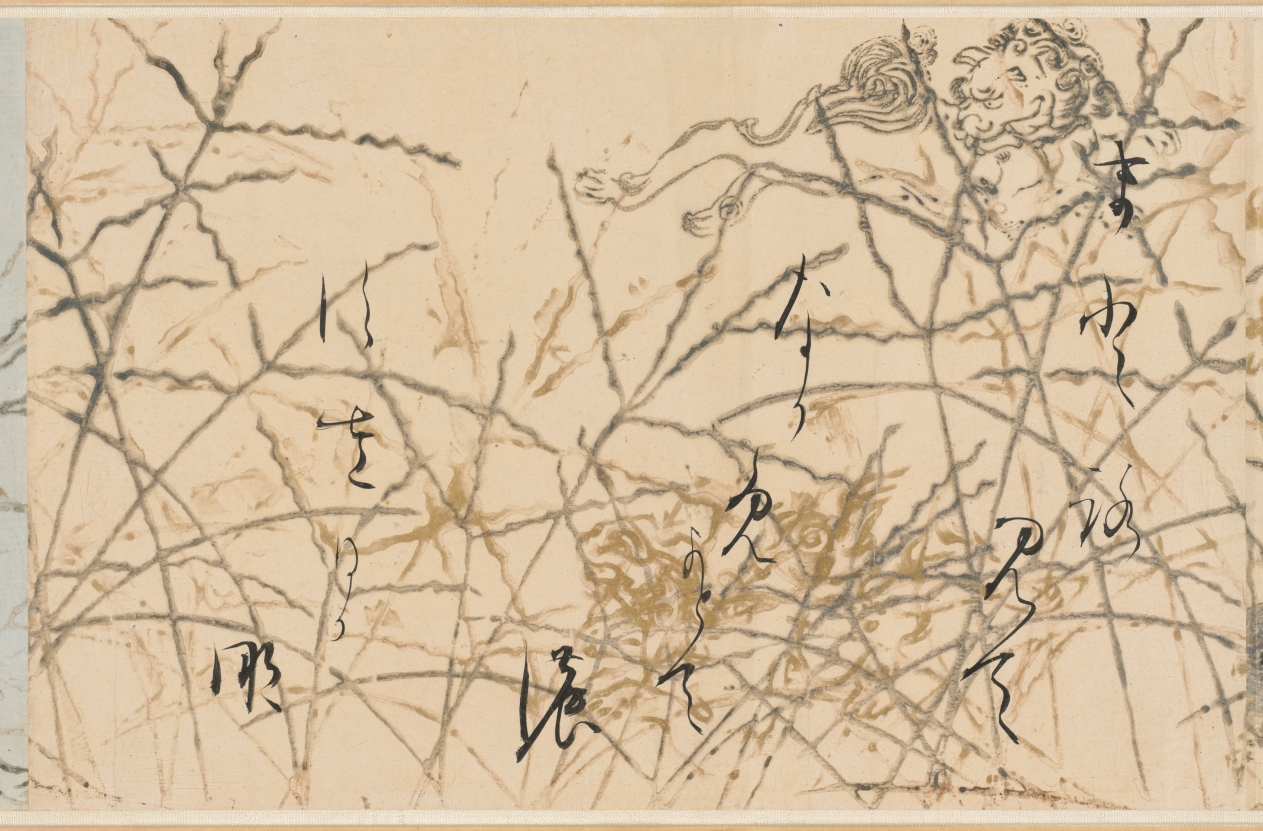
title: Selections from the New Collection of Japanese Poems from Ancient and Modern Times (Shinkokin wakashū) with Printed Designs of Chinese Lions and Crab Finger Grass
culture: Japan, Edo period (1615–1868)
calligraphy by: Hon'ami Kōetsu (Japanese, 1558–1637)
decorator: Tawaraya Sōtatsu (Japanese, c. 1570–c. 1640)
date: early 1600s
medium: handscroll; ink, gold, and silver on paper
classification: Calligraphy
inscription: Seal: 光悦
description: Hon’ami Kōetsu was a calligrapher and craftsman who frequently collaborated with the painter Tawaraya Sōtatsu, considered the first master of the Rinpa school. Kōetsu brushed seven poems from the autumn section of a poetry anthology onto dyed paper with motifs designed and printed in gold and silver by Sōtatsu.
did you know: Before becoming a master painter of screens, Tawaraya Sōtatsu painted fans.